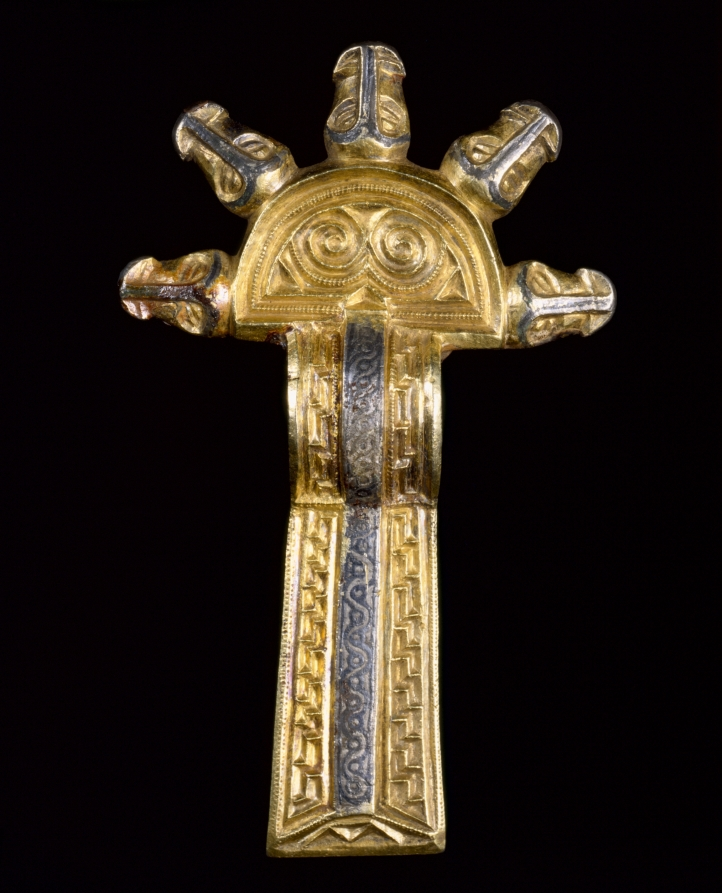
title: Fibulae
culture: Alemannic, Migration Period, 6th-7th century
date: 500s-600s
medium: cast silver, parcel-gilt, with niello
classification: Jewelry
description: A woman of high rank might have worn these twin fibulae on her shoulders, one fastening her inner garment on the right, the other her outer garment on the left. She might also have suspended them from her belt as decorative ornaments.